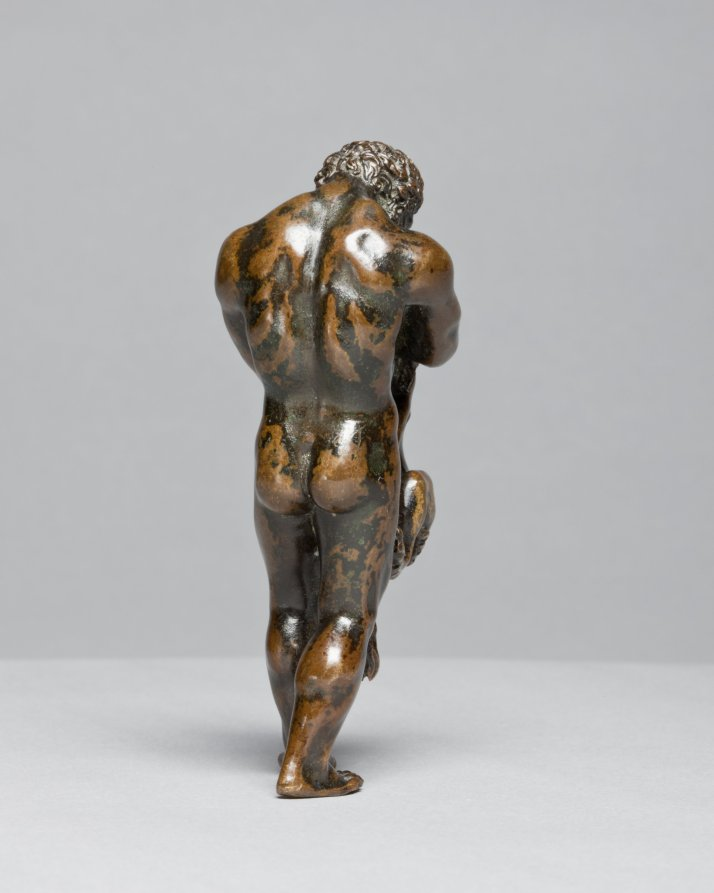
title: Hercules and the Nemean Lion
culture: Italy or France, 16th century or later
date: 1500s or later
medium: bronze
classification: Sculpture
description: The original owner of this work would have understood that this scene referred to the entire story of Hercules, the demi-god who had to accomplish twelve labors. The lion is named after the city of Nemea, near Corinth, a monstrous beast sent by the goddess Hera to wreak havoc on the area. After killing the lion, Hercules wore his pelt, commonly seen in other representations of the hero.